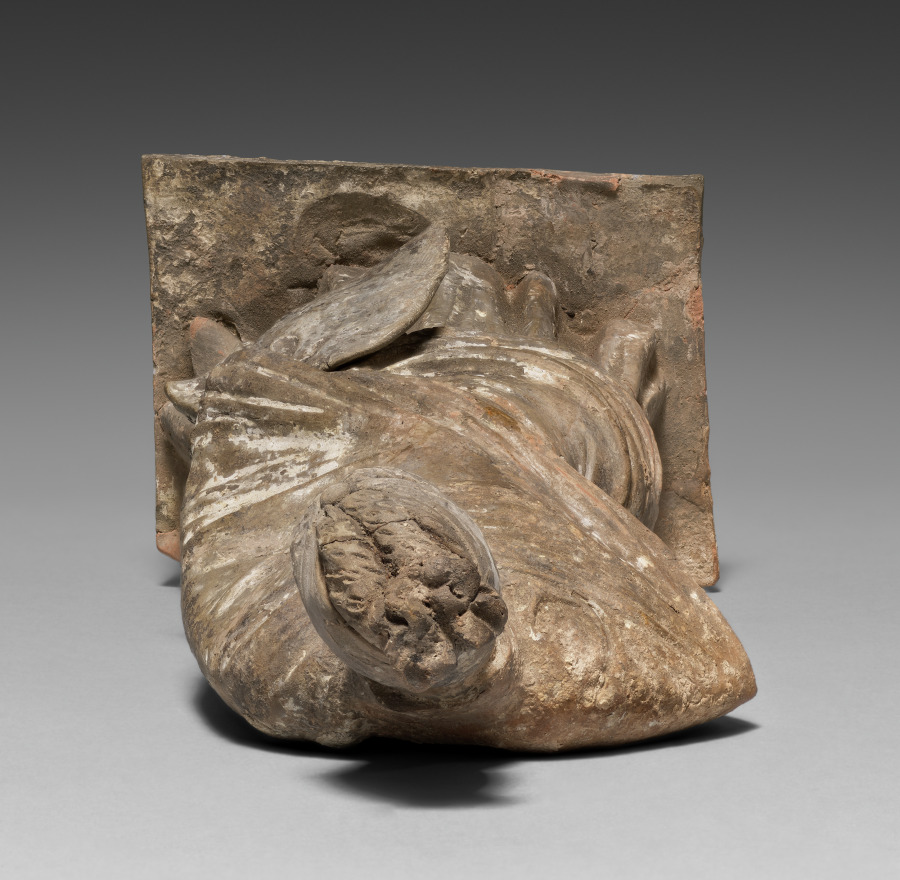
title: Figurine of a Lady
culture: Greece, Tanagra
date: 200s BCE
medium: terracotta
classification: Sculpture